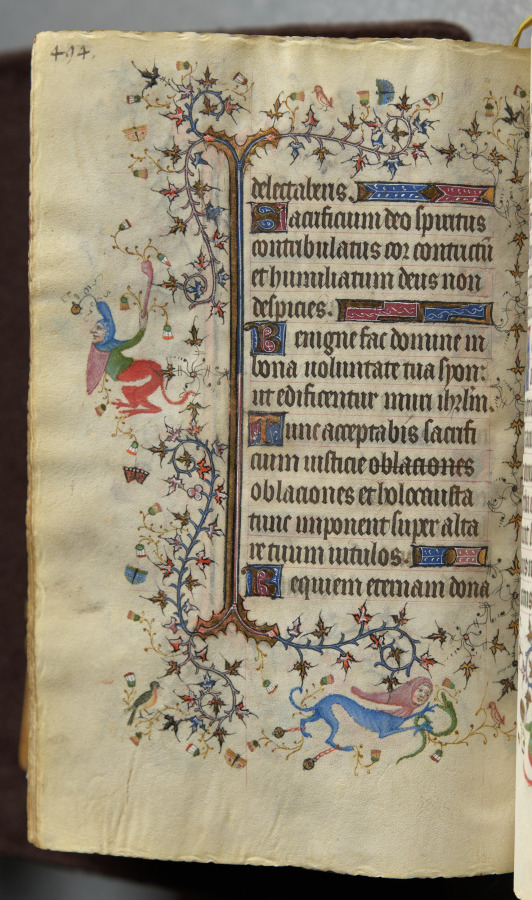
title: Hours of Charles the Noble, King of Navarre (1361-1425): fol. 241v, Text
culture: France, Paris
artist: Master of the Brussels Initials and Associates (French)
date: c. 1405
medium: ink, tempera, and gold on vellum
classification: Bound Volume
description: This precious volume was obviously highly prized by its owner, the French-born King of Navarre, who had his coat of arms painted on no less than twenty folios. Rather than directly commissioning this manuscript from a specific workshop, it seems that Charles the Noble acquired his book of hours -- perhaps ready-made for the luxury market -- while on a trip to Paris in 1404-05. A collaborative effort, six painting styles are evidenced within the pages of this codex, those of two Italians, two Frenchmen, and two Netherlanders. The painter who was responsible for the planning and decoration of the book, and who produced seventeen of the large miniatures, was a Bolognese artist known as the Master of the Brussels Initials. His principal assistant, responsible for most of the borders, was a Florentine who signed his name "Zecho" da Firenze on folio 208 verso.